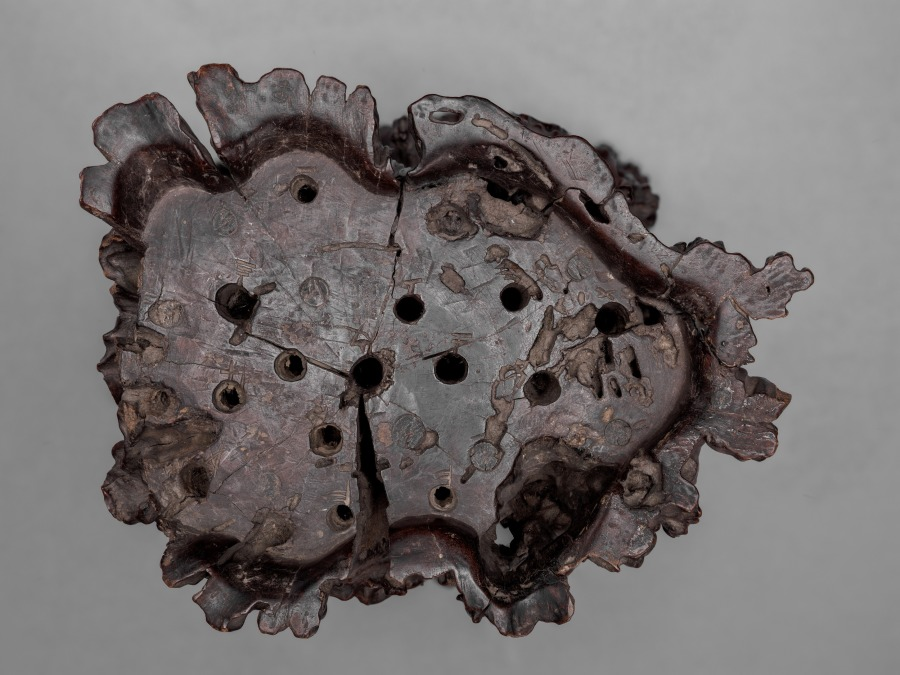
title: Prunus Wood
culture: China, Qing dynasty (1644-1911)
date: 1700–1899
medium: wood carving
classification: Wood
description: The gnarled and twisted form of a prunus stump is carved to accentuate its naturally textured surface. The body is finely polished to create a lustrous patina. Simple wood carvings like this exemplify the Chinese scholars’ taste for natural forms and rustic materials, which in turn reflect the desire to retreat into nature. They were collected and displayed as decorative works of art in the traditional scholars’ studios.